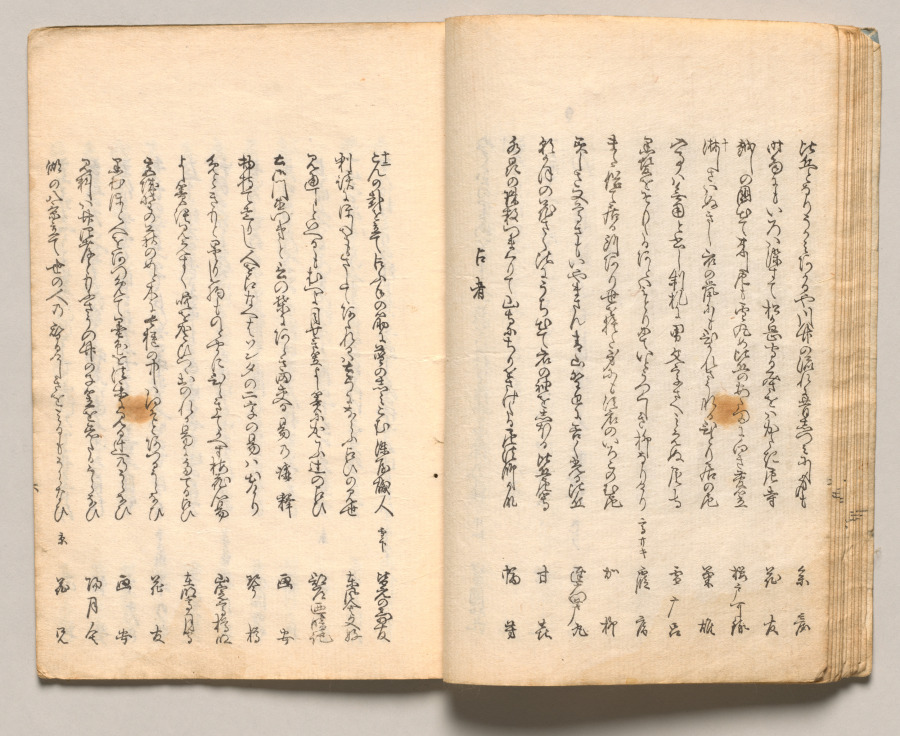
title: Spread Thirteen from Volume Two of People of Japan in Light Verse (Kyōka)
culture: Japan, Edo period (1615–1868)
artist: Utagawa Hiroshige (Japanese, 1797–1858)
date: 1857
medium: Woodblock-printed book; ink and color on paper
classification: Bound Volume